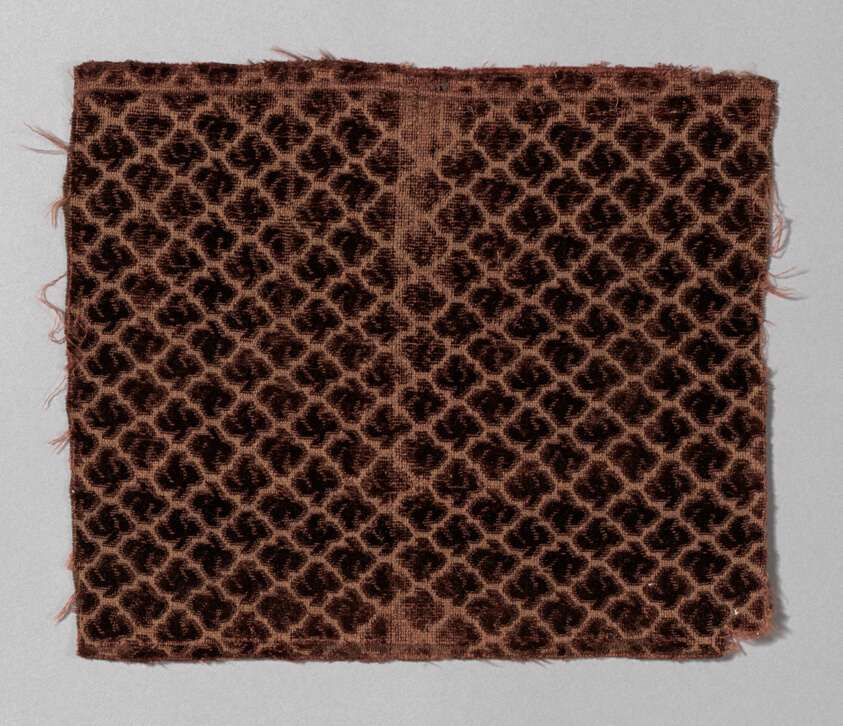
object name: Textile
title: Fragment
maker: Italy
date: Early 17th century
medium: Dark brown satin ground; cut velvet pattern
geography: Italy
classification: textile; weaving - velvet; weaving